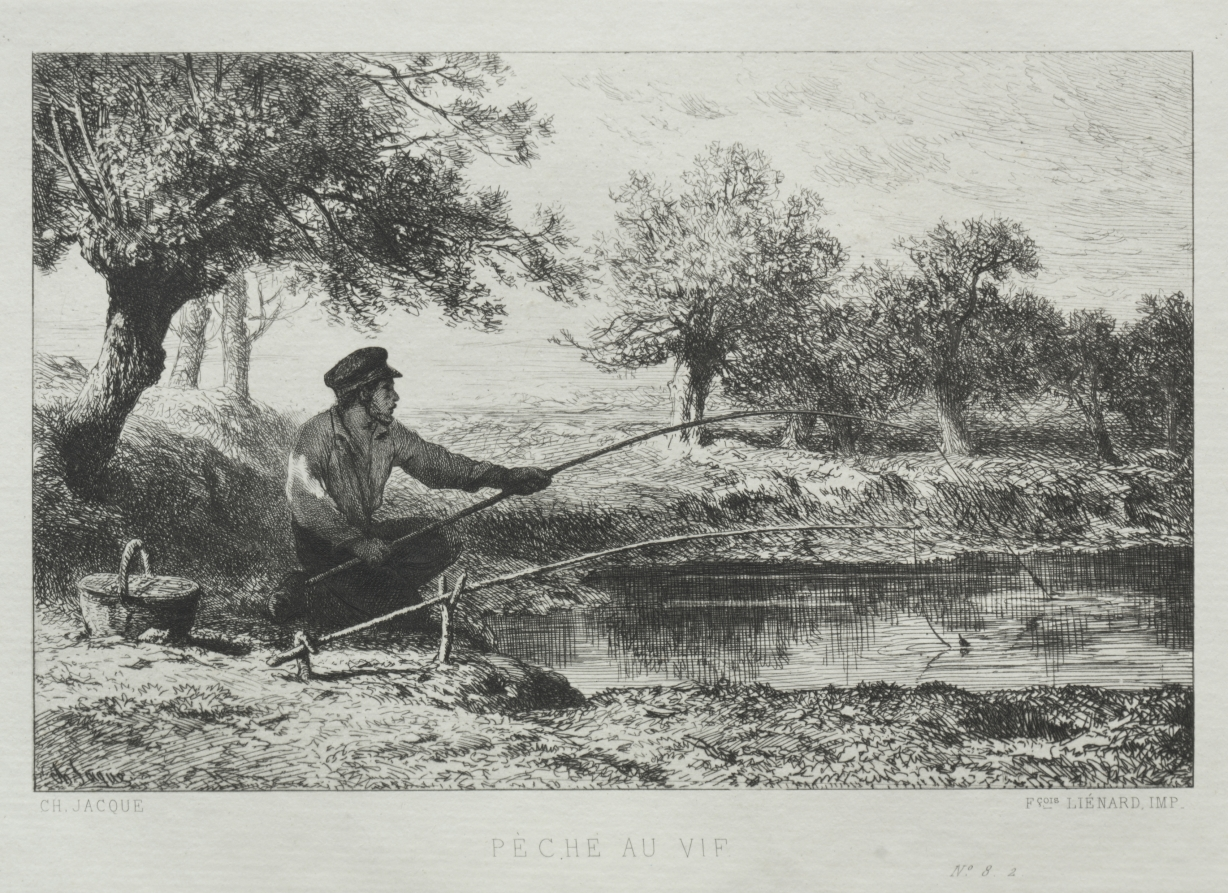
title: Fishing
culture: France, 19th century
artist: Charles-Émile Jacque (French, 1813–1894)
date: 1864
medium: etching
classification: Print